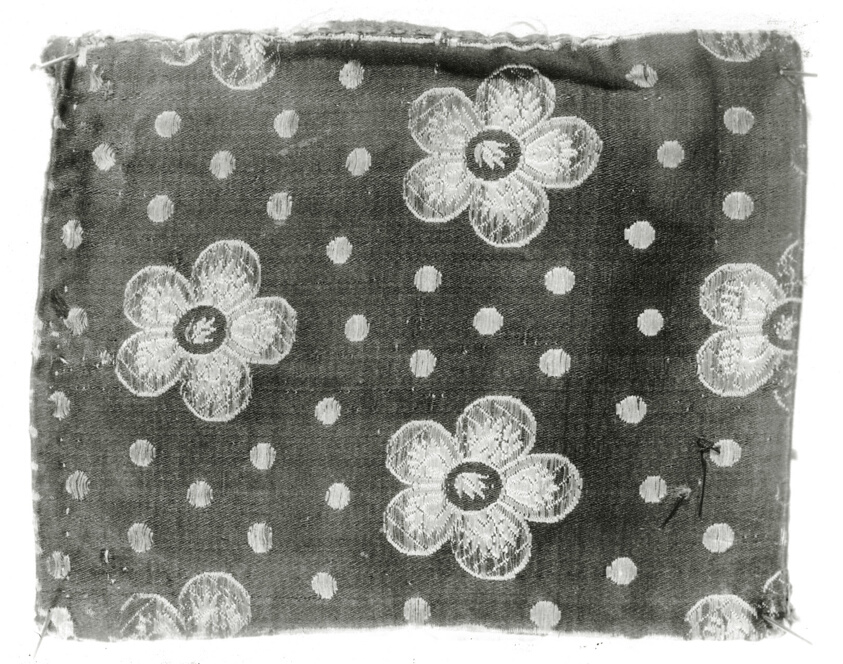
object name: Textile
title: Fragment (Dress Fabric)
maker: Iran (Persia, Isfahan)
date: 18th century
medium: Fancy compound satin, silk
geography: Iran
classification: textile; weaving